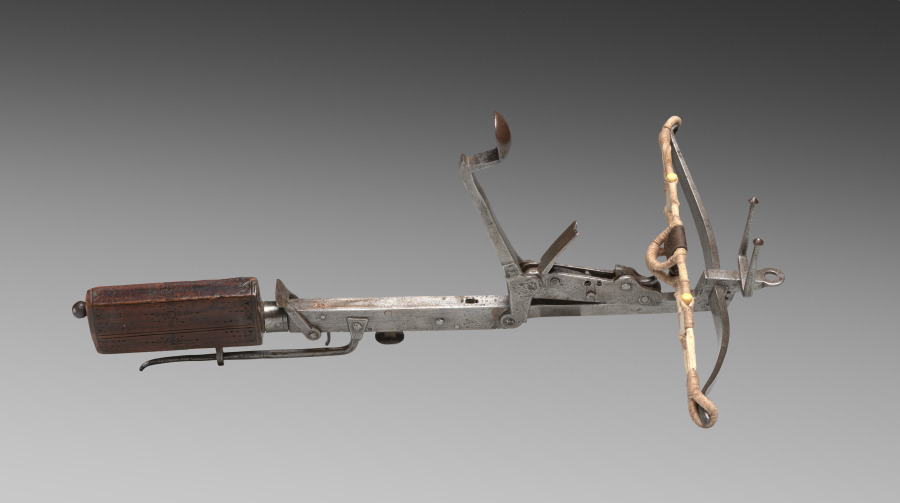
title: Pellet Crossbow for a Child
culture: Germany, early 17th Century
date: c. 1600–1650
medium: wood, bone inlay, steel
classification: Arms and Armor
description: This crossbow, made for the use of a small child, was designed to throw small stones or pellets. The bow string is an accurate replacement.